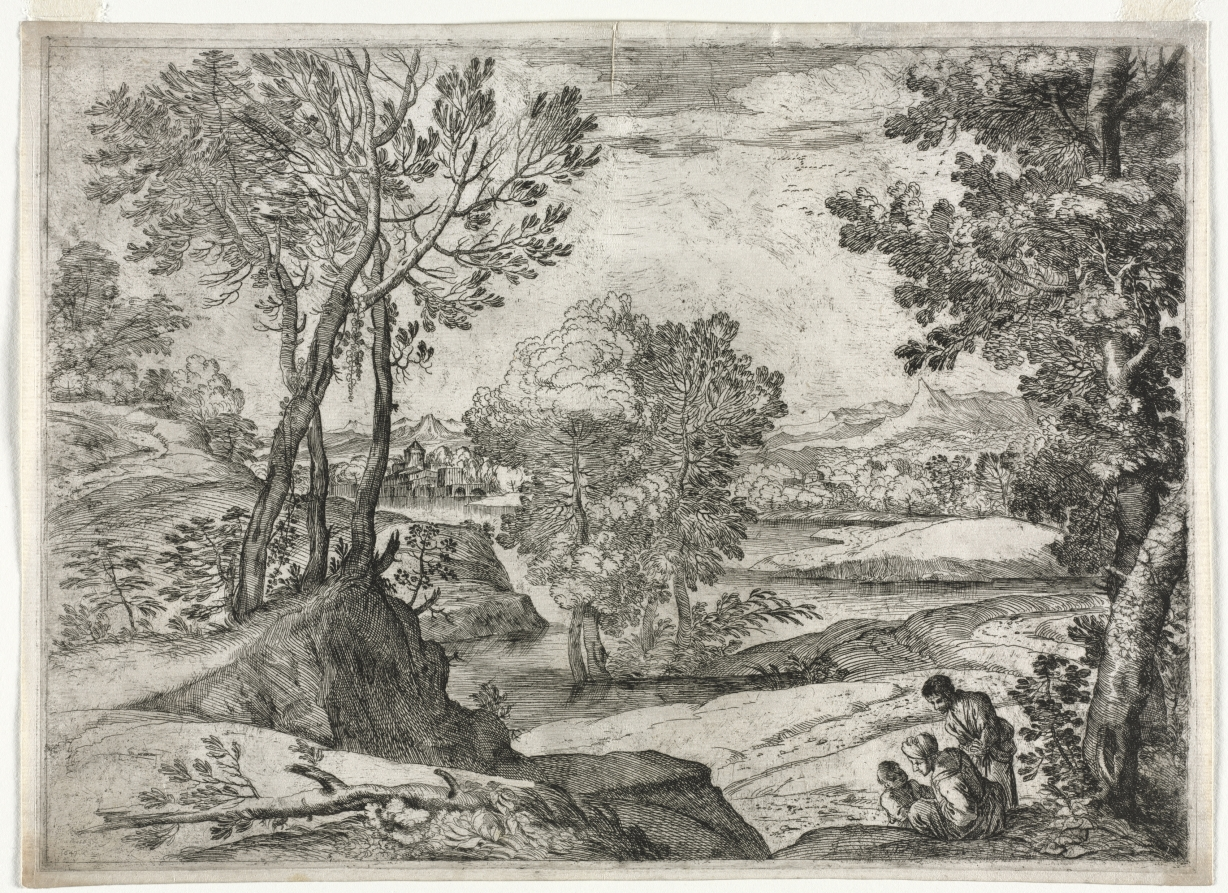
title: Landscape with a Family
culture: Italy, 17th century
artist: Giovanni Francesco Grimaldi (Italian, 1606–1680)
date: 1643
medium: etching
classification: Print